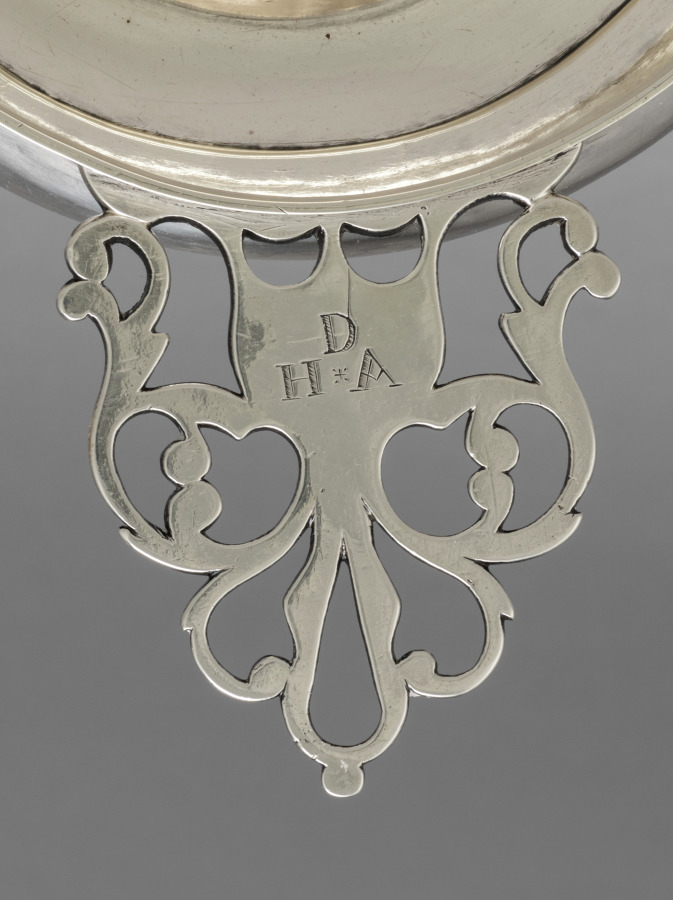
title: Porringer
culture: America, Massachusetts, Marblehead, 18th century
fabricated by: William Jones (American, 1694–1730)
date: 1725–1730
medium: silver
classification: Silver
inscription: engraved "D" over "H * A" in cross-hatched block initials on top of handle.